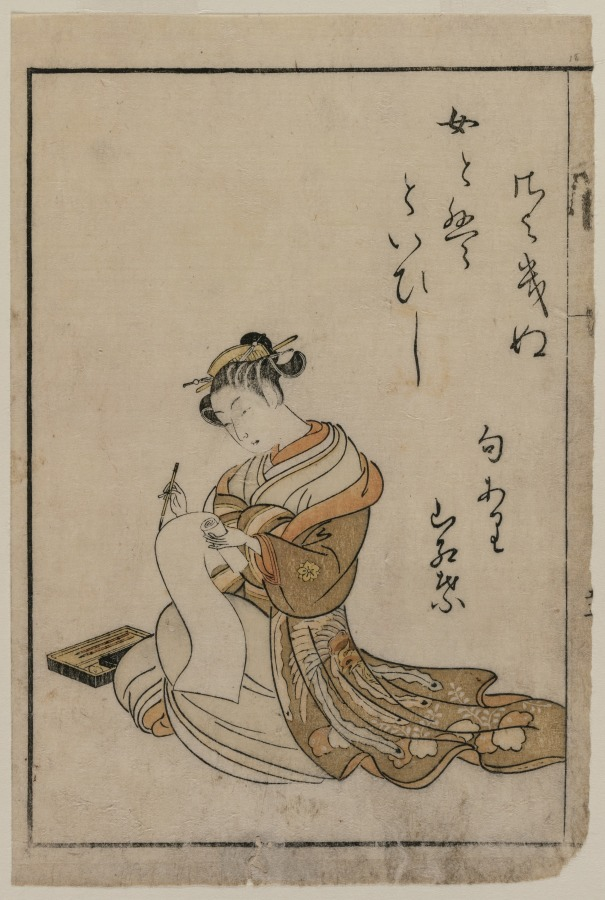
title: The Courtesan Writing from a Book from the series A Collection of Beautiful Women of the Yoshiwara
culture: Japan, Edo period (1615–1868)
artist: Suzuki Harunobu (Japanese, 1724–1770)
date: 1770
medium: color woodblock print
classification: Print